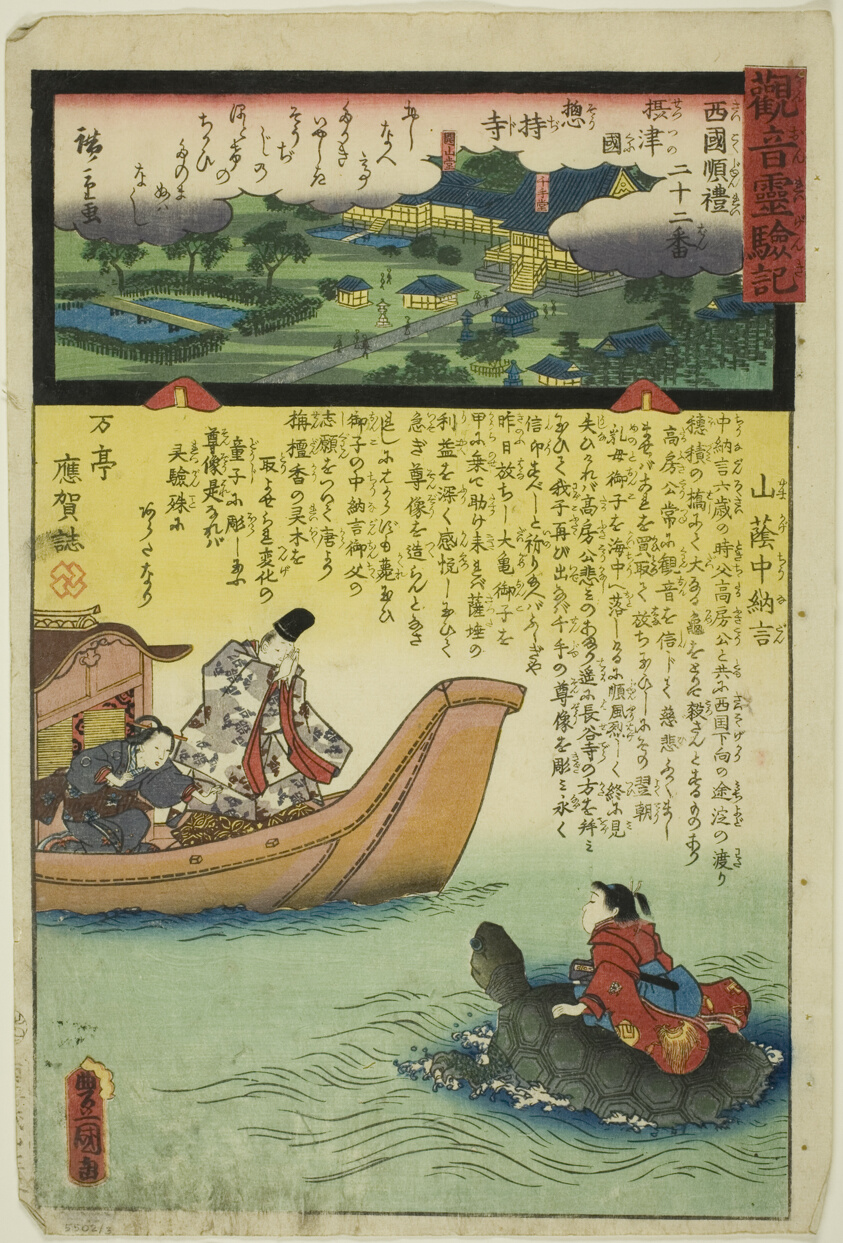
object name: Print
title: Soji Temple in Settsu Province, No. 22 on the Saikoku Pilgrimage Route (Saikoku junrei nijuniban Settsu no kuni Sojiji), from the series "The Miracles of Kannon (Kannon reigenki)"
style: Japanese (culture or style)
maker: Utagawa Kunisada I (Toyokuni III); Japanese, 1786-1864; Utagawa Hiroshige II (Shigenobu); Japanese, 1826–1869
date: 1859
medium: Color woodblock print; oban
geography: Japan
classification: woodblock print; print; asian art